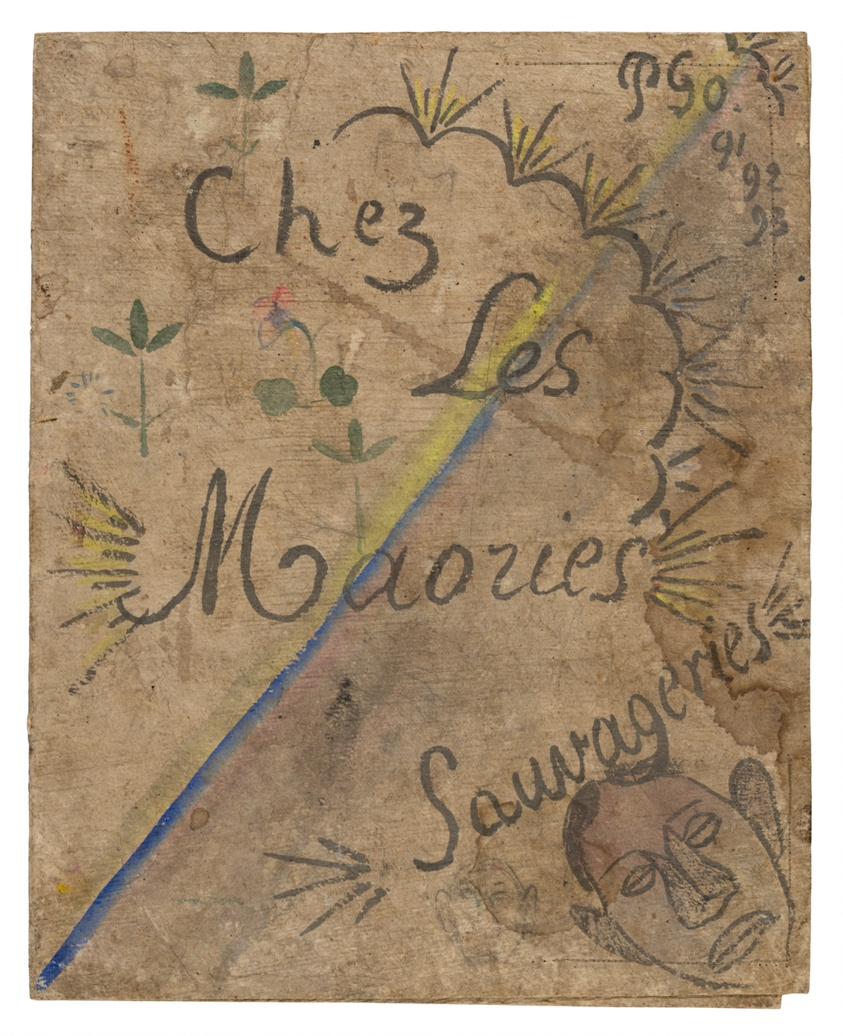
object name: Drawing and Watercolor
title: Chez les Maories: Sauvageries (At Home with the Maori: Savage Things)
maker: Paul Gauguin (French, 1848-1903)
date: 1893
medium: Watercolor, with traces of black crayon and graphite, on tapa, partially laid down on cream wove paper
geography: France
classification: gouache; drawings (visual works); prints and drawing